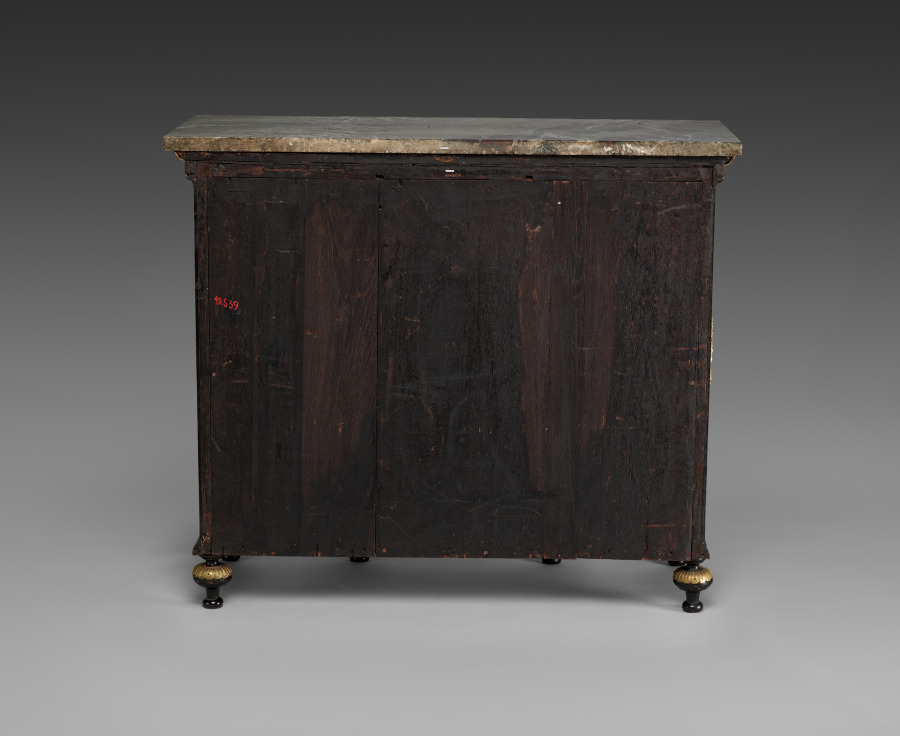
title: Cabinet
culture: France, late 17th Century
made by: André-Charles Boulle (French, 1642–1732)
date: c. 1690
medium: ebony, marquetry in metal and tortoise shell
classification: Furniture and woodwork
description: Appointed cabinetmaker to King Louis XIV in 1672, André-Charles Boulle became a master of furniture making in France during the late 1600s until his death in 1732. Known primarily for his use of marquetry, in which metal patterns are inlaid into tortoiseshell then applied within the veneered surface of the furniture, Boulle established a level of quality and craftsmanship few others could achieve. As a result, his work found favor at the royal court and among other aristocrats and diplomats eager to impress the king. The inclusion of a medallion depicting Louis XIV within the bronze decoration of this chest would have identified the owner with the royal court. Often exhibiting stout architectural proportions with elegant groups of inlaid motifs such as the parrot on the central panel of this chest, Boulle’s designs are an example of the intellectual fashion for contrasting ideas, materials, and motifs.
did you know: Originally designed to sit atop an elaborate tall stand, this chest was likely altered in the late 1700s to reduce its scale and height.